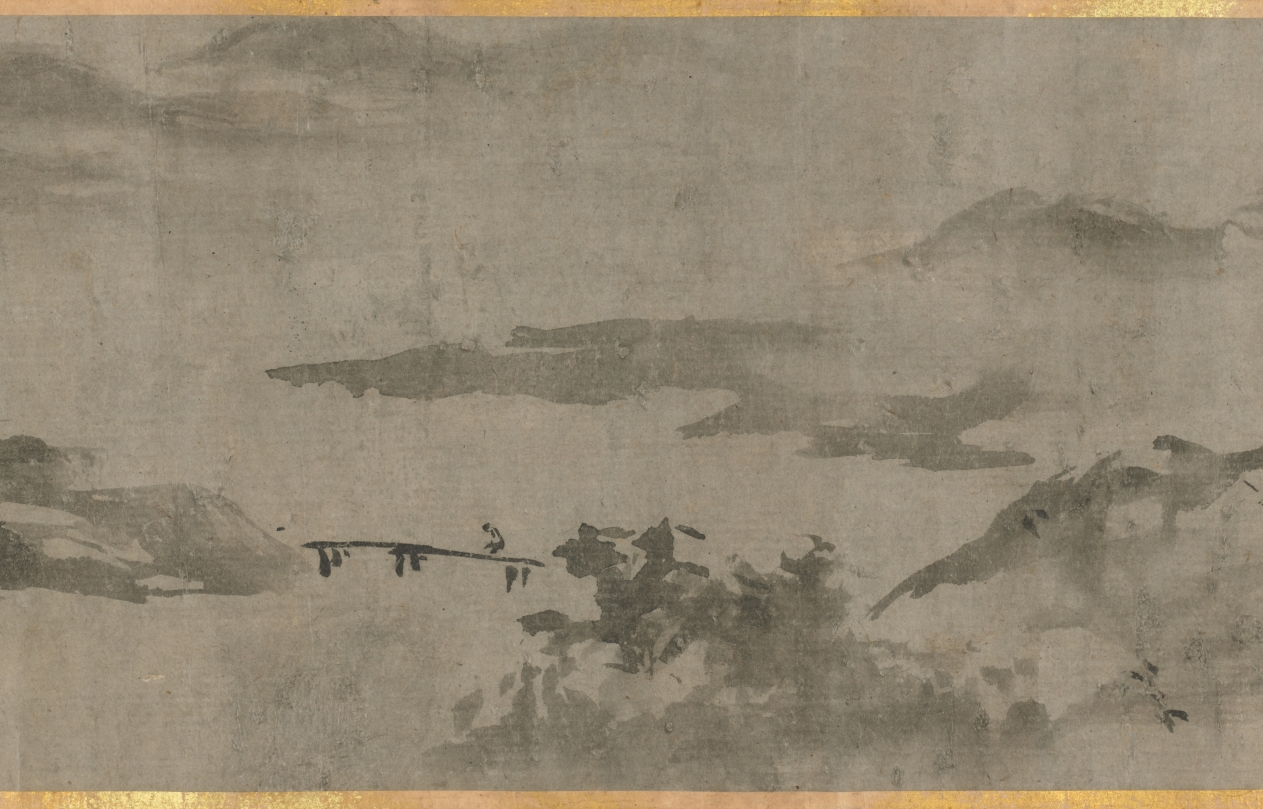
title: Eight Views of Xiao-Xiang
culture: Japan, Muromachi period (1392–1573)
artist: Sesson Shūkei (Japanese, c. 1492–c. 1577)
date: 1500s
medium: handscroll; ink on paper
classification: Painting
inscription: Signature and seal of artist at end of painting.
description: Eight Views of the Xiao and Xiang Rivers can be traced to 11th-century Chinese poems and paintings, the depiction of which had also become popular among Korean and Japanese painters. Xiao-Xiang refers to the region in present-day Hunan province where the Xiao and Xiang rivers converge. Few painters of the Eight Views had in fact seen the scenery; rather, they were trying to portray in ink and wash the lyrical qualities of dim light and a misty atmosphere typical of that region. Each of the poetic titles suggests a time of day, a season, or specific atmospheric conditions—subjects that challenged the abilities of the most talented artists. In this miniature painting (shukuzu) of the Muromachi period, Japanese Zen monk and painter Shukei Sesson depicted all eight views featured in Chinese prototypes: Wild Geese Descending to Sandbar; Returning Sails Off a Distant Coast; Mountain Market in Clearing Mist; River and Sky in Evening Snow; Autumn Moon over Dongting Lake; Night Rain on the Xiao and Xiang; Evening Bell from Mist-Shrouded Temple; and Fishing Village in Evening Glow.